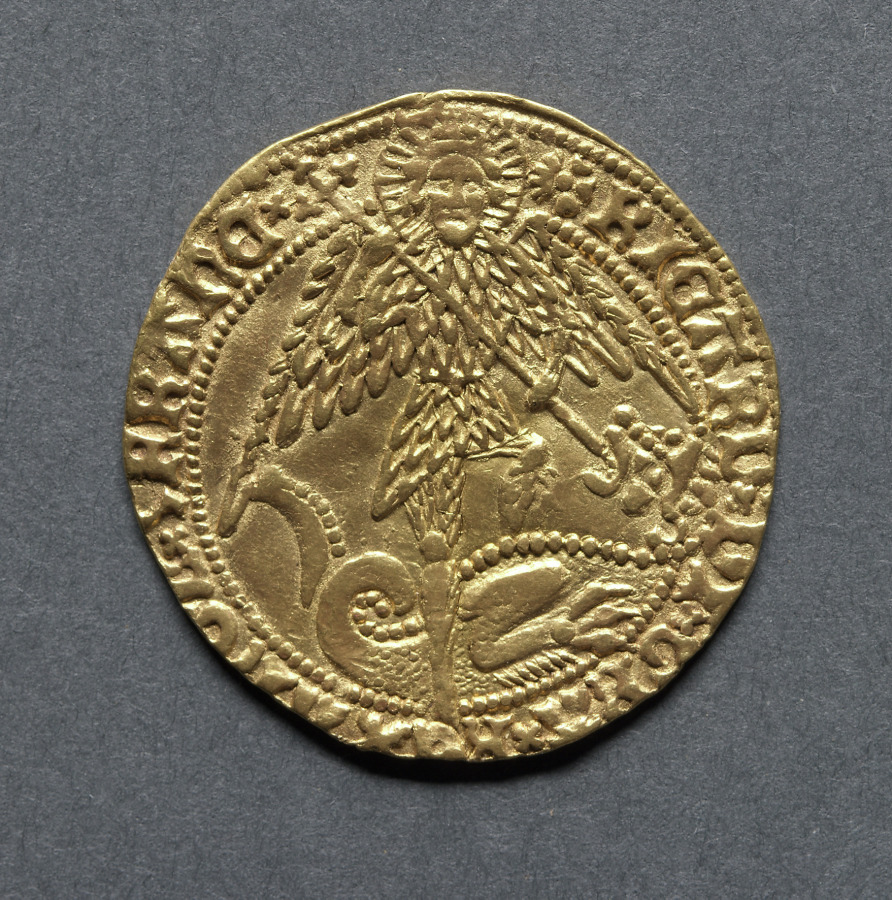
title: Angel: St. George Slaying the Dragon (obverse)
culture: England, Richard III, 1483-1485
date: 1483–1485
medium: gold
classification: Coins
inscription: RICARD DIGRA REX ANGL Z FRANC